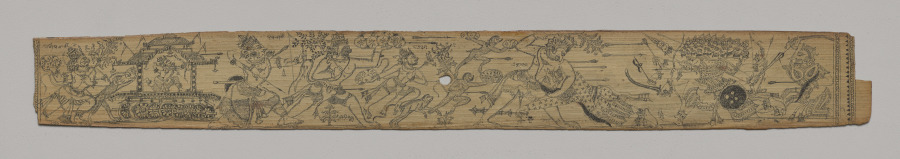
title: The Monkeys and Bears Fight Ravana and His Demons (verso), from a Romance of Chandrabhanu and Lavanyavati of Upendra Bhanja (Indian, died 1740)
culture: Eastern India, Odisha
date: late 1700s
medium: Charcoal on palm leaf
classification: Painting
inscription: on both recto and verso in Oriya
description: This leaf from an 18th-century romance manuscript comes from a section of the book that retells the epic battle between the demon Ravana and the god-hero Rama. The 10-headed multiarmed demon Ravana is the second figure from the right. Rama’s army of monkeys and bears, wielding tree branches and clods of earth, fill the remainder of the leaf. The images were created using a stylus that incised into the palm leaf; charcoal was then rubbed over the leaf and wiped off, leaving only the incised areas in black.